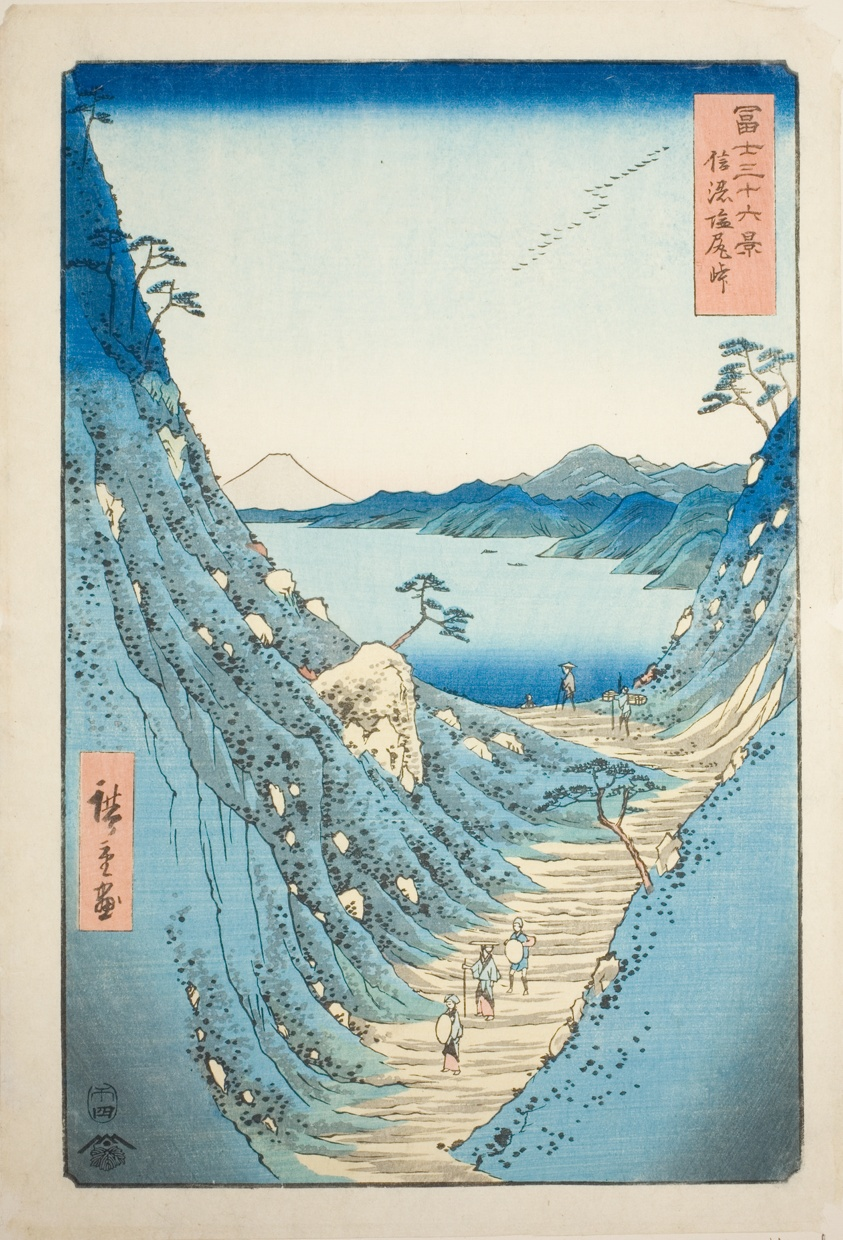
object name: Print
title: Shiojiri Pass in Shinano Province (Shinano Shiojiri toge), from the series "Thirty-six Views of Mount Fuji (Fuji sanjurokkei)"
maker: Utagawa Hiroshige 歌川 広重; Japanese, 1797-1858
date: 1858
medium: Color woodblock print; oban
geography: Japan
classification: woodblock print; print; asian art